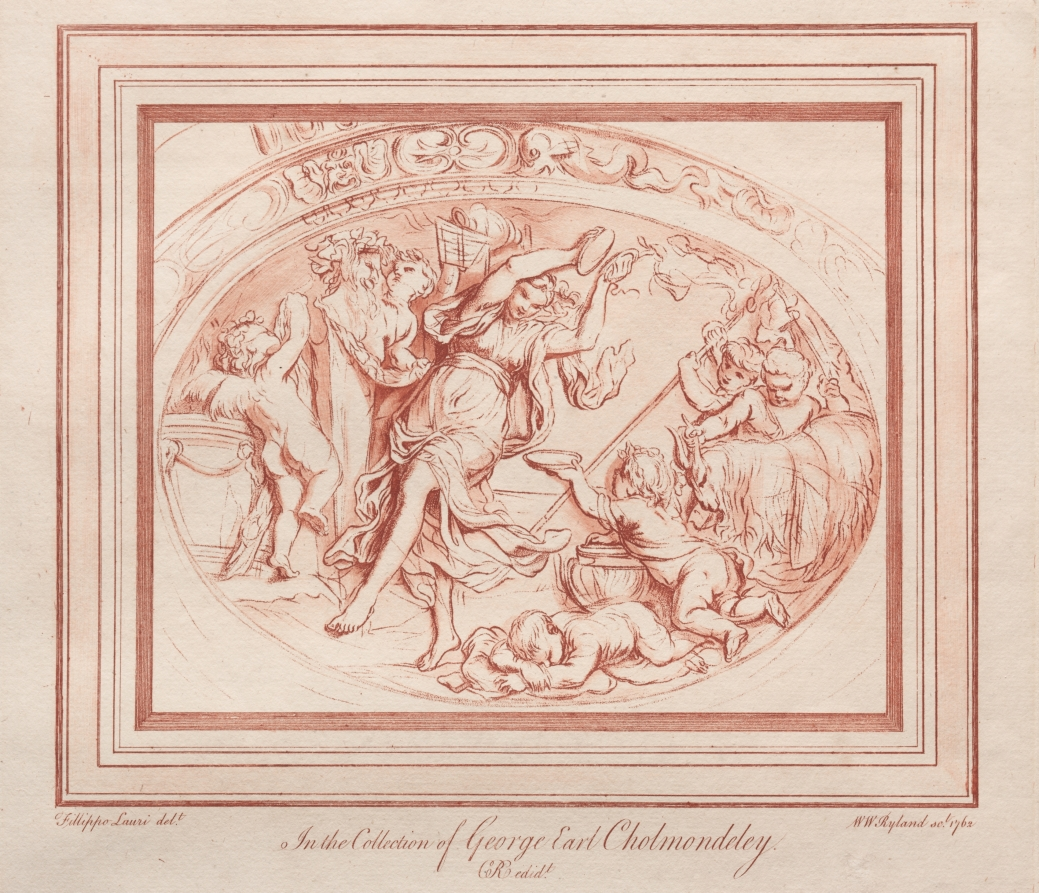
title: Corsica e Satiro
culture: England, 18th century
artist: William Ryland (British, 1732–1783)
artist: after Filippo Lauri (Italian, 1623–1694)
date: 1762–1763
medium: chalk-manner etching and engraving printed in red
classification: Print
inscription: inscribed, lower margin, in plate: In the Collection of George Earl Cholmondeley. / CR edidt.; inscribed, lower margin, in plate: In the Collection of Mr. Thos. Hudson, Painter. / CR edidt.